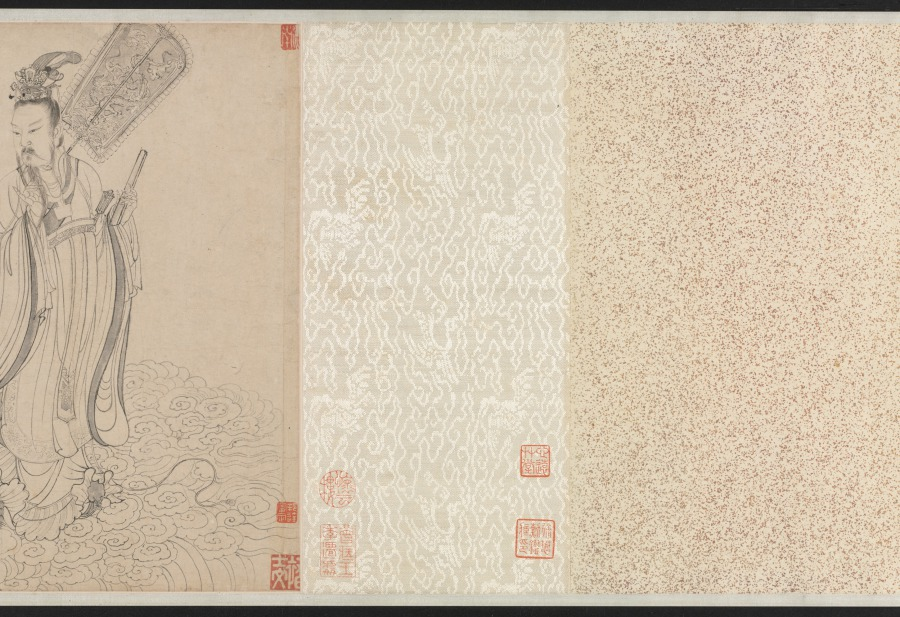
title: Nine Songs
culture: China, Yuan dynasty (1271-1368)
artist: Zhang Wo (Chinese, active c.1336–after 1364)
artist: Chu Huan (Chinese, active 1361)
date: 1361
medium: handscroll; ink on paper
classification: Painting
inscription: 7 colophons and 47 seals: 1 colophon, dated 1361, and 28 seals of Chu Huan 褚奐 (active c. 1361); 1 colophon, dated 1785, and 1 seal of Lu Shihua 陸時化 (1714-1779); 2 seals of Lu Yü-ch'ing (18th c.); 1 colophon, dated 1935, of Ye Gongchuo 葉恭綽 (1881-1968); 1 colophon, dated 1935, of Wu Hufan 吳湖帆(1894–1968); 1 colophon, dated 1938, and 1 seal of Wang Tongyu 王同愈 (1856-1941); 1 colophon, dated 1941, of Wu Huayuan 吳華源 (1893-1972); 1 colophon, dated 1942, and 9 seals of Xu Bangda 徐邦達 (1911–2012); 1 colophon, dated 1942, of Lang Jingshan 郎靜山 (1892-1995); 1 colophon, dated 1944, of Tang Yun 唐雲 (1910-1993); 6 seals of Wang Jiqian [C.C. Wang] 王季遷 (1907–2003).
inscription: Text of The Nine Songs written by Chu Huan at the end of each section.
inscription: 右離騷九歌圖，宋龍溟居士李公本，淮南張渥叔厚所畫妙絕當世。家藏請予書其辭目識于左。至正二十一年辛醜三月旦河南褚奐記。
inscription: Colophon by Lu Shihua 陸時化 (1714–1789): This scroll is fortunate to have been handed down from collections of the right people. Now, after 500 years, its condition is as good as when it was painted. I acquired this from Mr. Shen Guiyu [1673-1769], the President of the Board of Rites. The label is in his handwriting when he was 95 years old. I submit that Chu Huan (t. Shiwen) of the Yuan Dynasty was a native of Qiantang. His "seal" and li writings are in the style of Wu Rui. For example, in [Chu Kuei's] Ming ji lu [A list of masterpieces] is recorded the stele commemorating the restoration of the prefectural school of Kun-shan, the text of which was composed by Yang Weizhen in the twenty-first year of Zhizheng [1361]; and the calligraphy as well as the title in li style was by Chu Huan, who was at that time an assistant judge of the prefecture of Haining in the circuit of Hangzhou. Zhang Wo's zi is Shuhou (叔厚). His literary name is Zhen Qisheng (贞期生). According to [Gu Ying's] Yu shan cao tang ya jii, he liked to paint in the bai-miao or the "pure delineation" style after the method of Li Longmian [Li Gonglin 李公麟], which finds no peer among the ancient masters. This is agreed upon [by Pei Ch'iung] in his Qing jiang zhi who praised [Zhang Wo] as being quite learned and well-versed in many branches of the arts, especially figure painting. Recorded by Lu Shihua [The mountain dweller], listening to the pine, in the twelfth month of the yisi year [1785].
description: Painted in the baimiao, or fine-line drawing style, this ancient work demonstrates the literati’s use of abstract calligraphic brushwork for self-expression. The subject of the “Nine Songs”—songs associated with shamanistic rituals in the ancient Chu kingdom—had traditionally provided artists with myths and legends that they could explore and reinterpret in their own works.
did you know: Divided into eleven sections, the scroll contains illustrations by painter Zhang Wu followed by a transcription of the relevant verse by calligrapher Chu Huan.